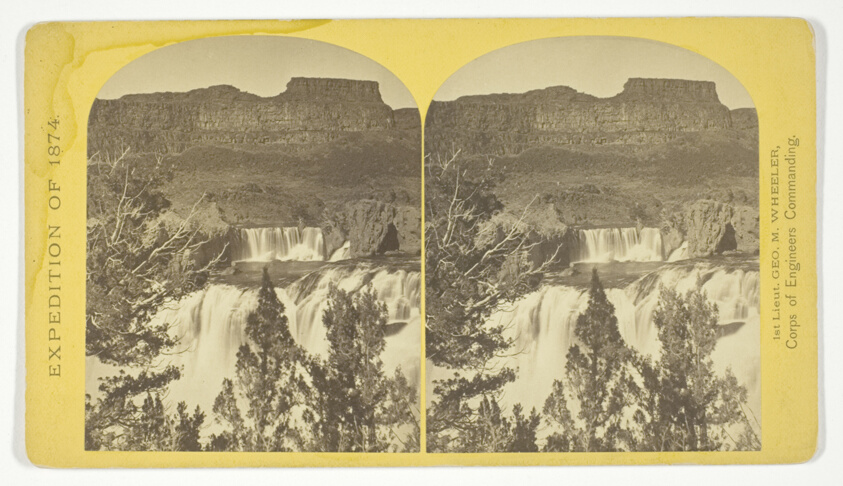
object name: Photograph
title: Shoshone Falls, Snake River, Idaho, looking through the timber, and showing the main fall, and upper or "Lace Falls", No. 49 from the series "Geographical Explorations and Surveys West of the 100th Meridian"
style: 19th century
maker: Timothy O'Sullivan (American, born Ireland, 1840–1882); commissioned by George Wheeler for the War Department, Corps of Engineers, U.S. Army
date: 1874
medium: Albumen print, stereo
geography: United States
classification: stereograph (albumen); photography; photograph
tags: Collected by Hugh Edwards, Geographical Explorations and Surveys